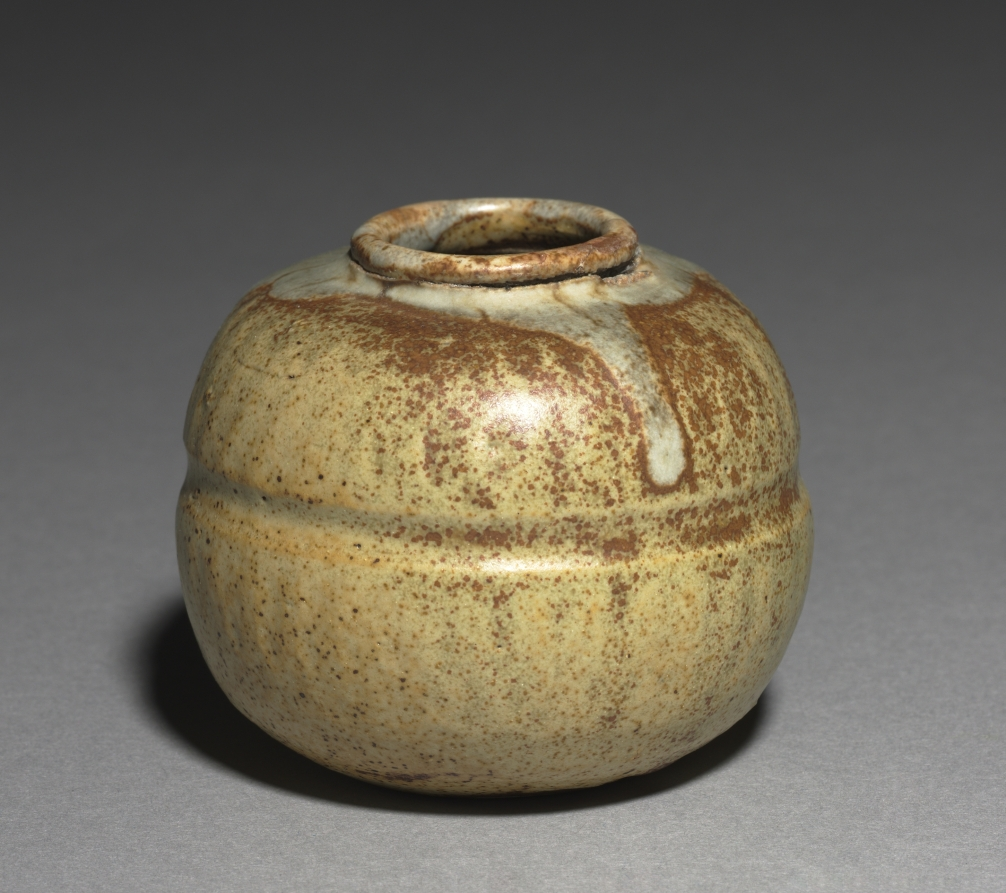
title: Small Pot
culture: France, early 20th Century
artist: Georges Hoentschel (French, 1855–1915)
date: c. 1900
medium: earthenware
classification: Ceramic